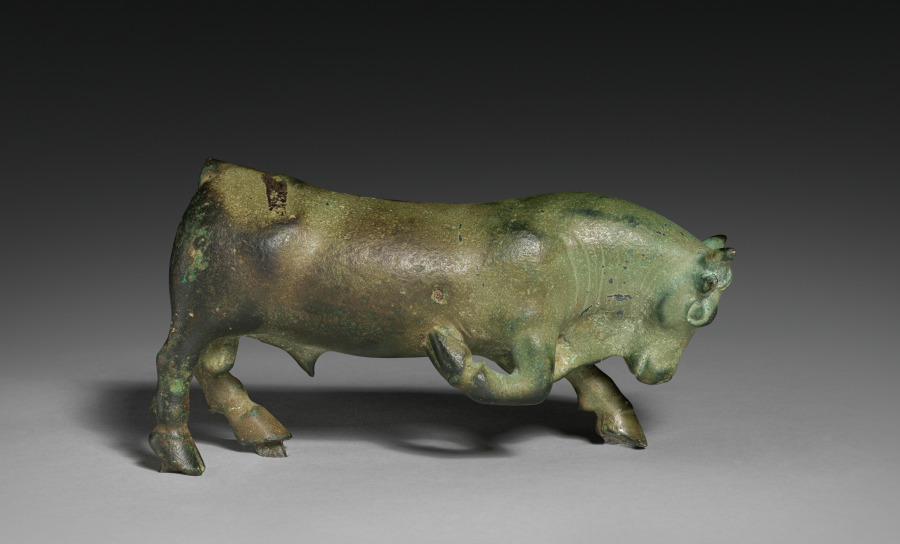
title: Pawing Bull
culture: South Italy, Lucania, Greek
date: 500–475 BCE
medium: bronze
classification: Sculpture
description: With its head slightly lowered and right foreleg raised in a pawing motion, this robust bull seems poised for action. The pose closely resembles that of bulls on coins minted at Thurii, a Greek colony in South Italy, but the statuette seems earlier in date and could have other associations. Perhaps the bull once carried the princess Europa, for example, or battled a lion or a hero. Alternatively, it may have stood alone as a small-scale offering, representing the actual bulls sometimes sacrificed to deities.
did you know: This solid-cast bronze bull is nearly intact, missing only its tail.